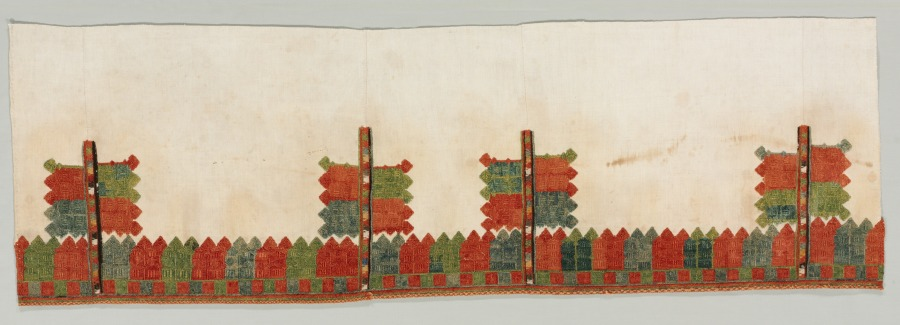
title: Skirt Border and Sleeve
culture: Greece, Dodecanese Islands, 18th century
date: 1700s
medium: embroidery: silk on cotton tabby ground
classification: Embroidery